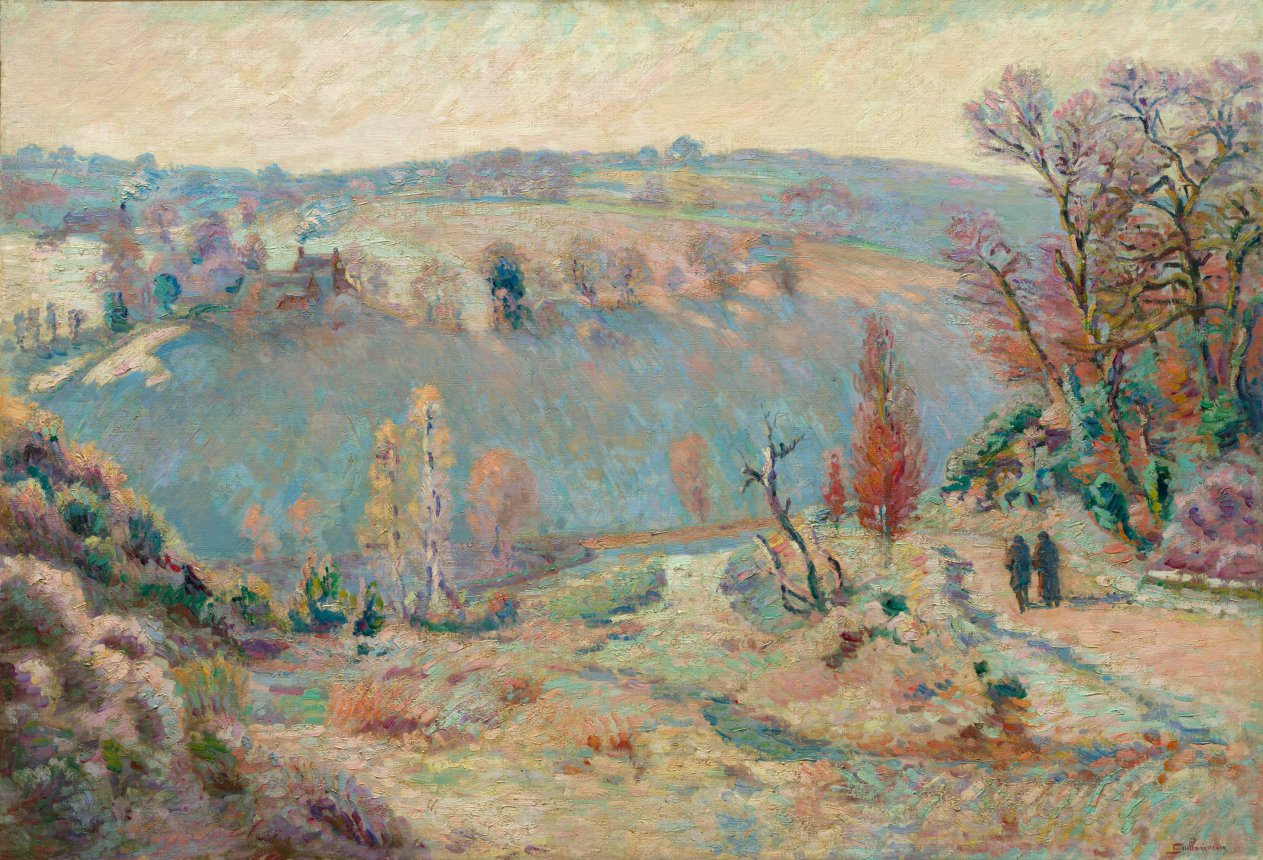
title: Valley of the Sédelle at Pont Charraud: White Frost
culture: France, late 19th-early 20th century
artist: Armand Guillaumin (French, 1841–1927)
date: c.1903–1911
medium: oil on fabric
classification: Painting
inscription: Signed lower right: Guillaumin